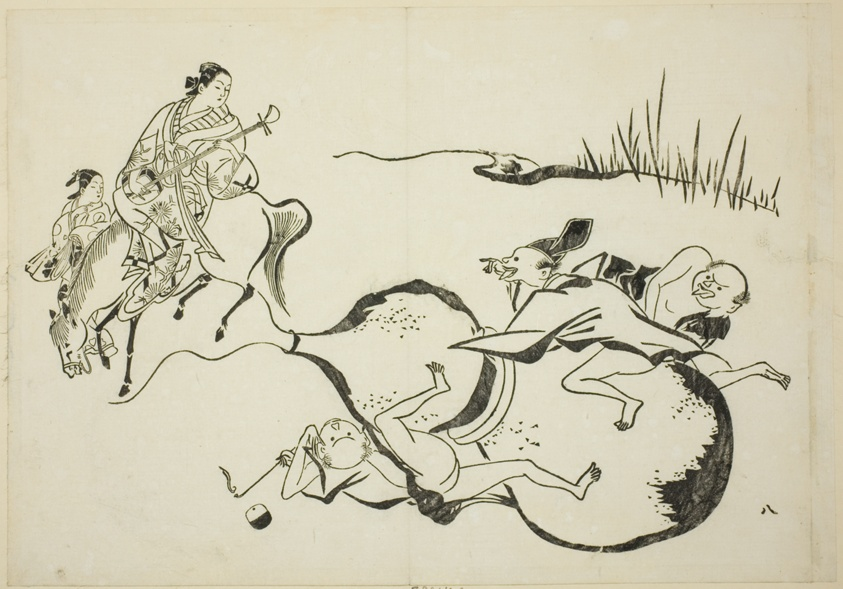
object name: Print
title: An Impossible Feat by Imaginary Men, no. 8 from a series of 12 prints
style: Japanese (culture or style)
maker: Okumura Masanobu (Japanese, 1686-1764)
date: c. 1708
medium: Woodblock print; oban, sumizuri-e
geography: Japan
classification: woodblock print; print; asian art; woodblock